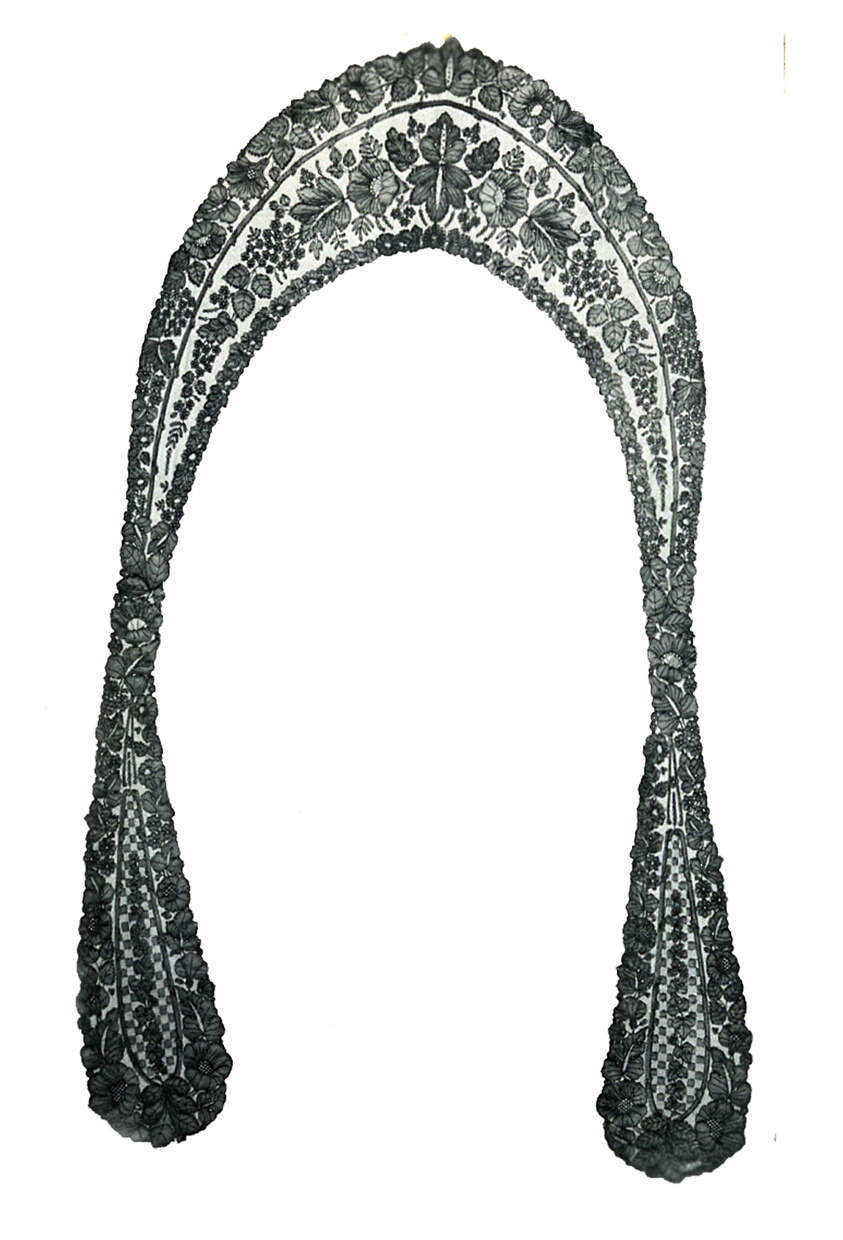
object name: Costume and Accessories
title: Collar with Lappets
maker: France, probably Bayeux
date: 1875/1900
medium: Silk, bobbin straight lace (made in vertical strips)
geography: France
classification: costume accessory; lace - bobbin; textile; costume; costume accessory - headdress; costume accessory worn above the waist